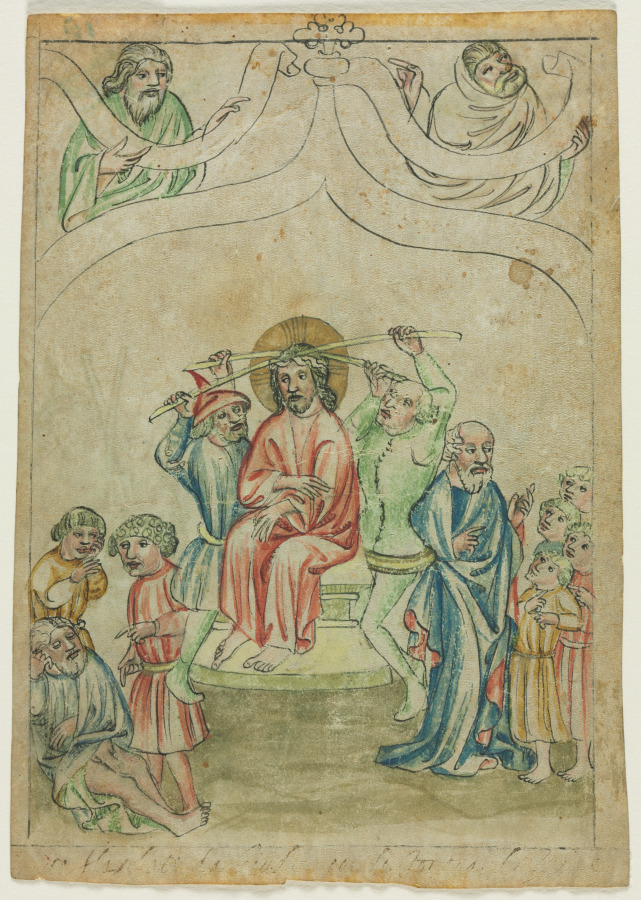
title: Single Leaf from a Biblia Pauperum: Christ Crowned with Thorns (recto)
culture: Germany, Bavaria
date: c. 1410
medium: ink and tempera on vellum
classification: Manuscript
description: Also known as the "Poor Man's Bible," the Biblia Pauperum was a simple picture book used to explain biblical prophecies and symbolism. These volumes served as an aid for preachers to demonstrate the unity of the Bible. The iconography of these popular books juxtaposed two Old Testament scenes with one from the life of Christ. In this example, the image of Christ crowned with thorns. The Biblia Pauperum appeared first in manuscript form in the 1200s, became a popular picture book with miniatures in the 1300s, and after 1450 it emerged as a print book with woodcuts.